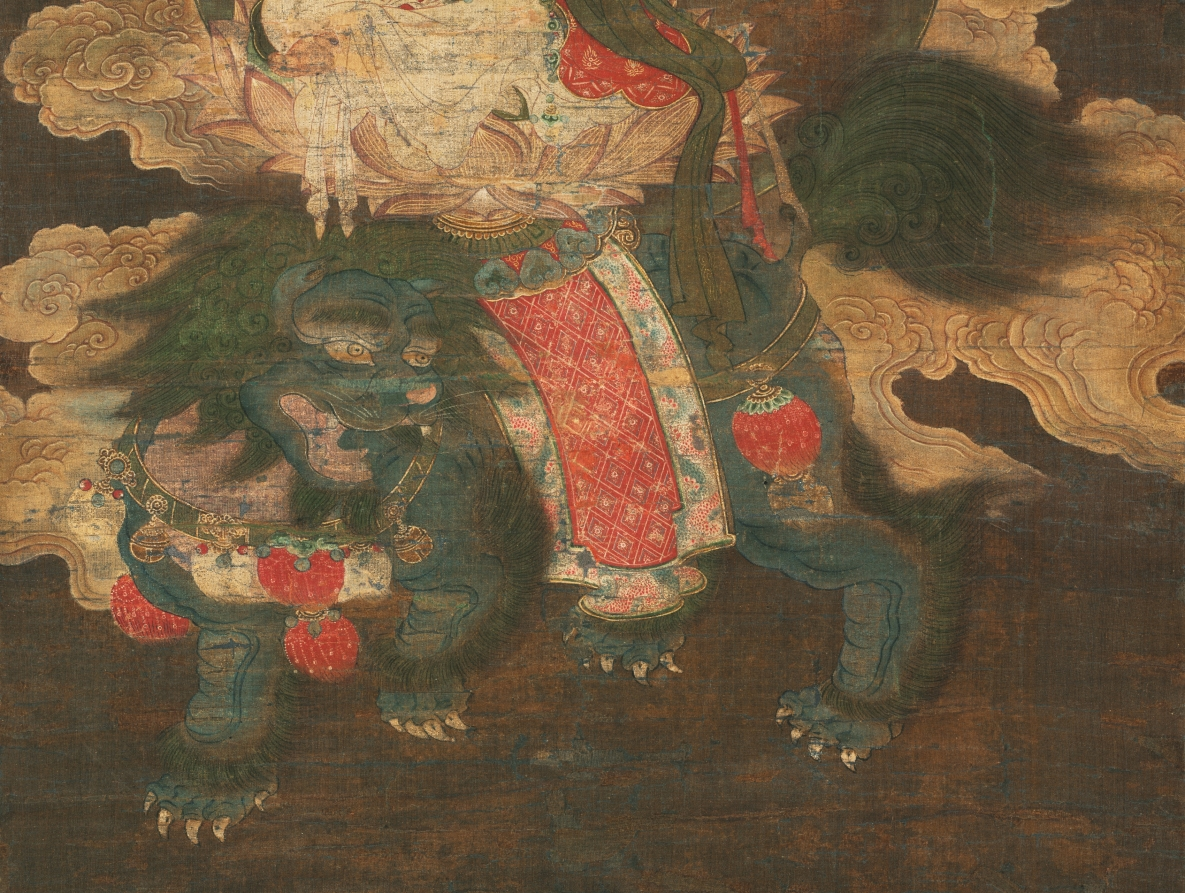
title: Shakyamuni Triad: Buddha Attended by Manjushri and Samantabhadra (Bodhisattva with Lion)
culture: China, Fuzhou, Fujian Province, Yuan dynasty (1271-1368)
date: late 1300s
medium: Hanging scroll; ink and color on silk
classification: Painting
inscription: Inscription at the bottom of the central scroll reads: "Da Song Fuzhou fu…(Fuzhou prefecture of the great Song)."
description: This triptych is a rare example of Yuan Buddhist painting. It depicts the historic Buddha Shakyamuni flanked by two attending bodhisattvas, Manjushri (the bodhisattva of wisdom, riding a lion) and Samantabhadra (the bodhisattva of universal virtue, riding an elephant). Below them are others seeking enlightenment: two disciples of the Buddha (Ananada and Kasyapa), two non-Chinese people, a boy with topknots, and a female worshiper. The clouds above and around the divine beings form one scene that illustrates Shakyamuni’s sermon from the Lotus Sutra. This text became an important basis for Buddhist faith throughout East Asia and was central to the Mahayana school of Buddhism.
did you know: Manjushri, the bodhisattva of wisdom, leads the child Sudhana on his quest for enlightenment.